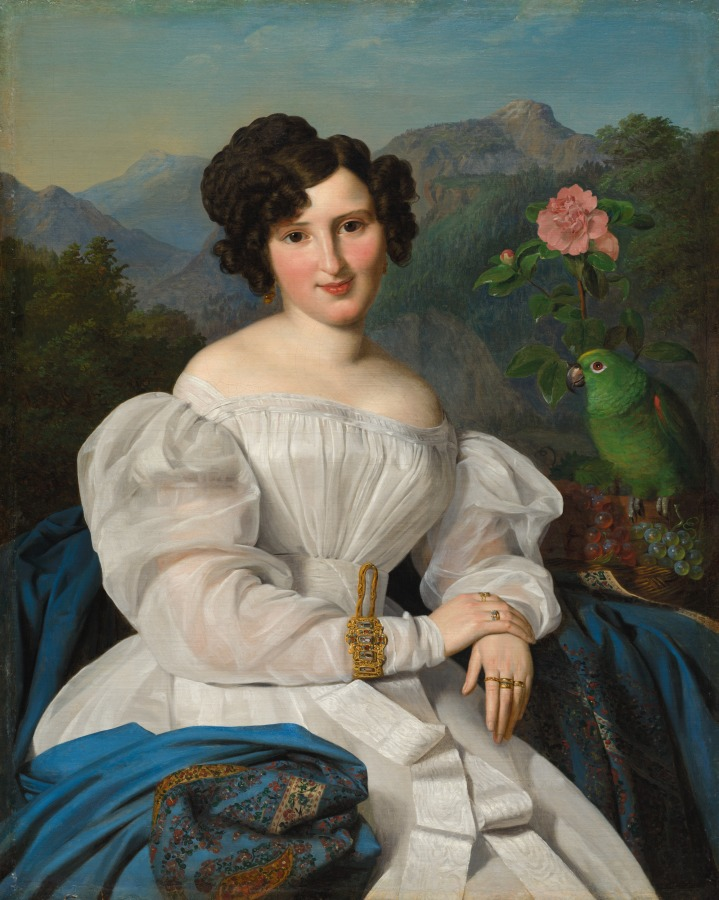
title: Countess Széchenyi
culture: Austria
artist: Ferdinand Georg Waldmüller (Austrian, 1793–1865)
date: 1828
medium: oil on fabric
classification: Painting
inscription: Signed below the parrot: Waldmül[. . .] 1828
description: This portrait typifies painting in Vienna between 1815 and 1865, an era known as the Biedermeier period, during which the Habsburg government promoted positive artistic depictions of Viennese life and culture. The mountains in the background express both the artist's romantic fascination with nature and patriotic devotion to his Austrian homeland. The sitter, Crescentia Seilern, was a prestigious member of the aristocracy who married Hungarian reformist patriot István Széchenyi.